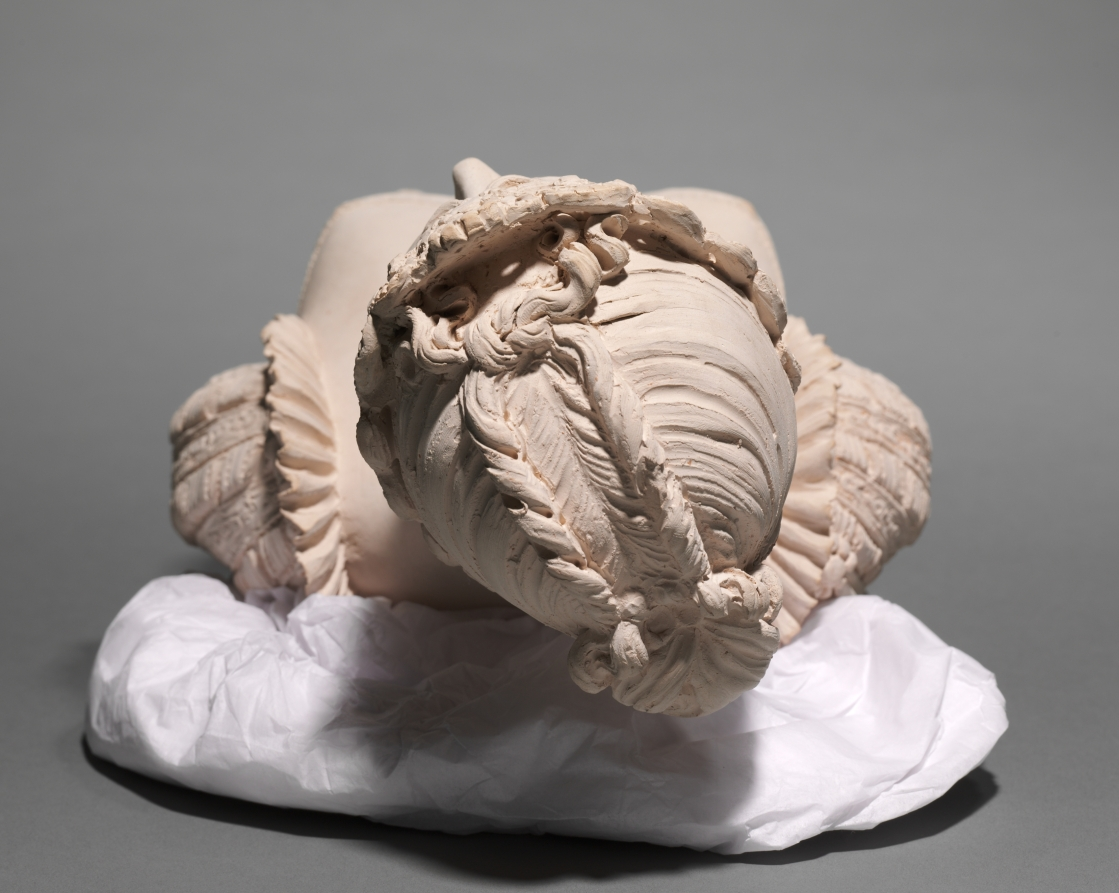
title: Bust of Empress Josephine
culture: France, 19th century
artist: Joseph Chinard (French, 1756–1825)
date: 1805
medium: terracotta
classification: Sculpture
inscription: inscribed on front of base in ligature: "chinard a milan"; inscribed on back of base in ligature: "chinard/de/l'institut m(al?)/membre de plusiere [sp]/ academies/milan-an l (3?)"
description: This bust of the Empress Josephine was sculpted in Milan in 1805 when she accompanied Napoleon to that city for his coronation as the King of Italy.